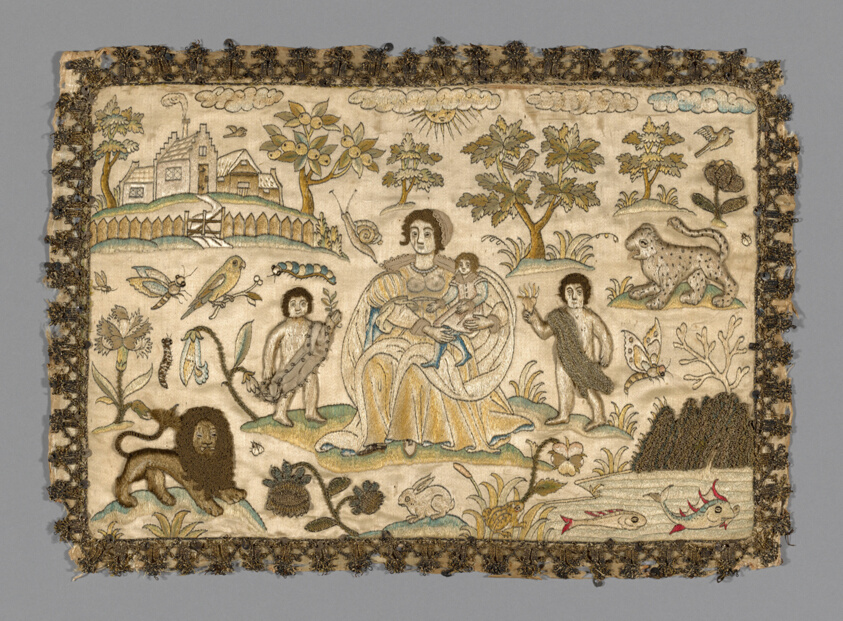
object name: Textile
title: Panel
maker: England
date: 17th century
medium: Silk, satin weave; embroidered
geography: England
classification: textile; needlework (visual works)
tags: religious scenes